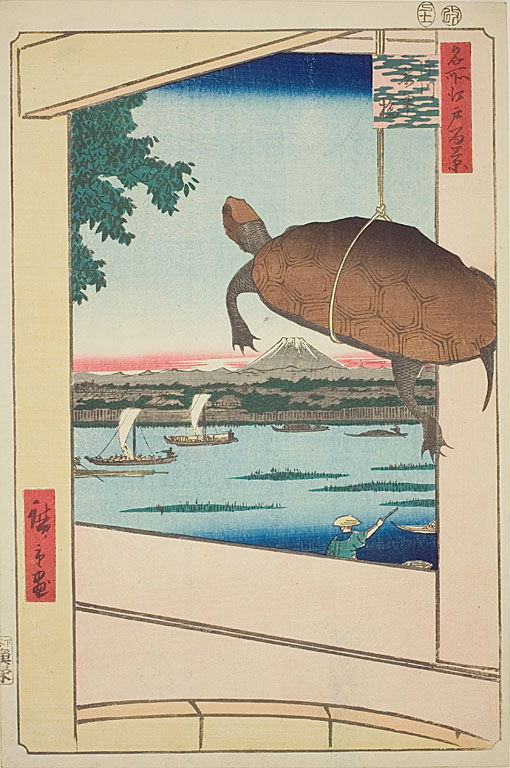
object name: Print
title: Mannen Bridge, Fukagawa (Fukagawa Mannenbashi), No.56 from the series "One Hundred Famous Views of Edo (Meisho Edo hyakkei)"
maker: Utagawa Hiroshige (Japanese, 1797-1858)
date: 1857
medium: Color woodblock print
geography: Japan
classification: woodblock print; print; asian art